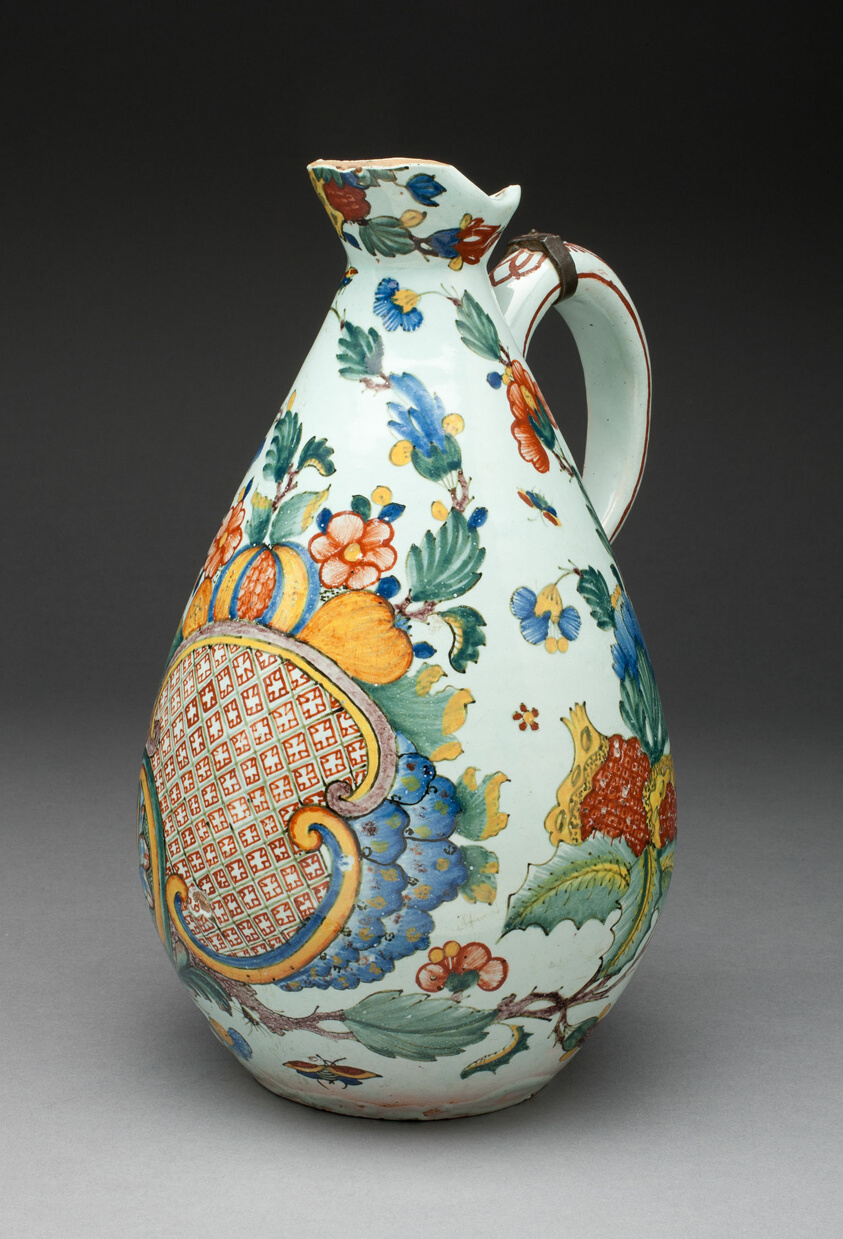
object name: Ceramics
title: Cider Jug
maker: France, Rouen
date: c. 1760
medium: Tin-glazed earthenware (faience) and metal mount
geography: Rouen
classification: tin-glazed ware; earthenware; european decorative arts; ceramics